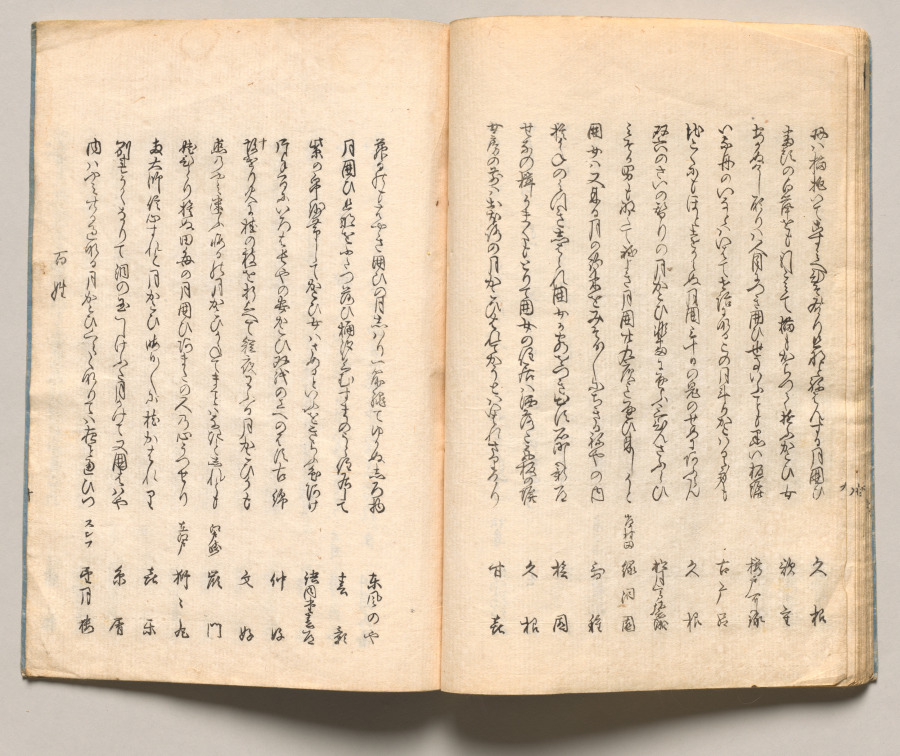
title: Spread Eighteen from Volume One of People of Japan in Light Verse (Kyōka)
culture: Japan, Edo period (1615–1868)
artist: Utagawa Hiroshige (Japanese, 1797–1858)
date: 1857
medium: Woodblock-printed book; ink and color on paper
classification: Bound Volume